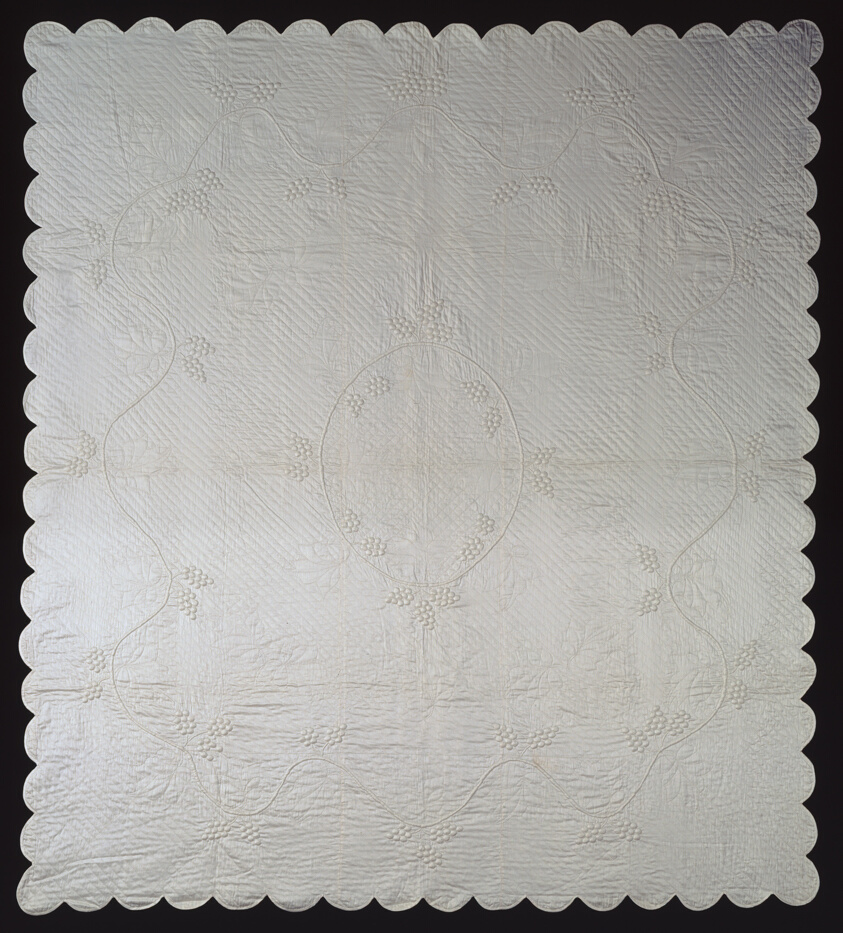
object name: Textile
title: Bedcover Entitled "Wedding Quilt"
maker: United States, Kentucky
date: c. 1910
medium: Cotton, warp-float faced 4:1 satin weave; quilted with raised areas (trapunto)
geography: Kentucky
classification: textile; needlework - quilt